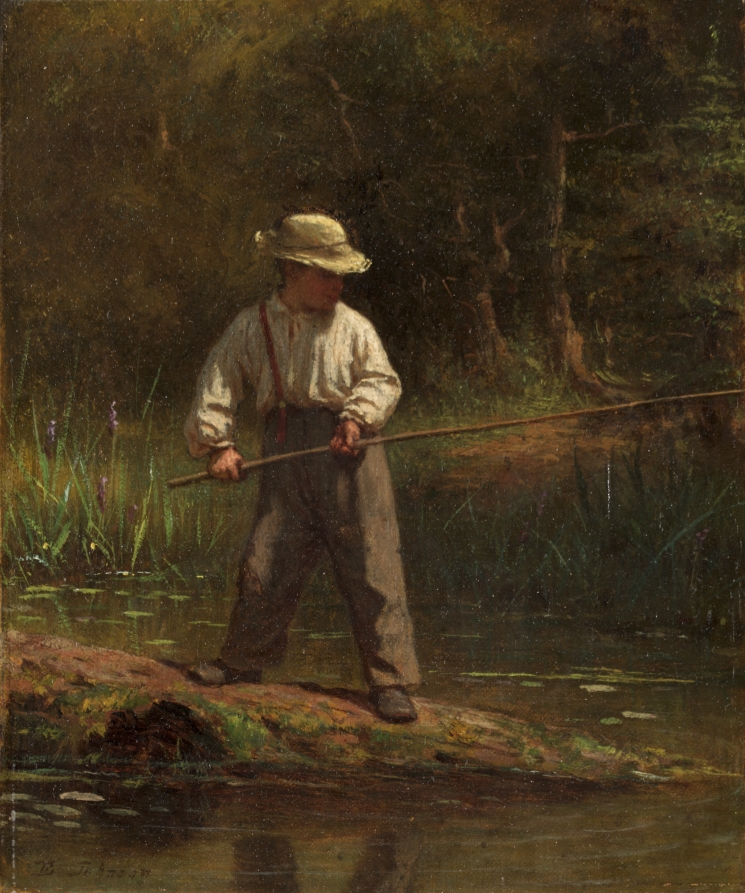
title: Boy Fishing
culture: America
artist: Eastman Johnson (American, 1824–1906)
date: 1860s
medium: oil on canvas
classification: Painting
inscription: signed lower left: E Johnson